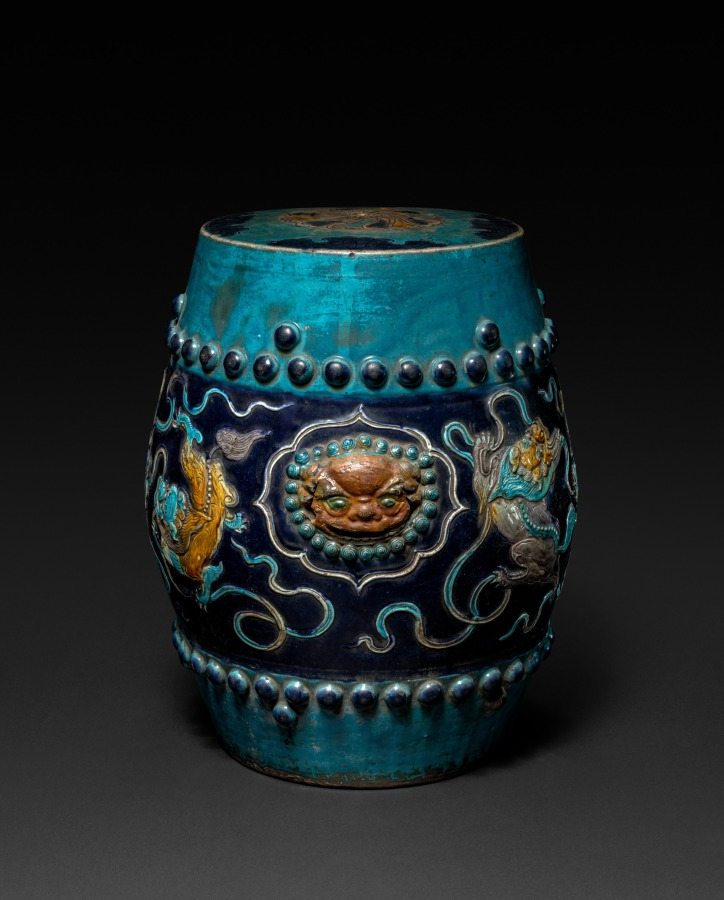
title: Garden Seat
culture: China, Jiangxi Province, Ming dynasty (1368–1644)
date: 1368–1644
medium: porcelain, Fahua ware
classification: Ceramic